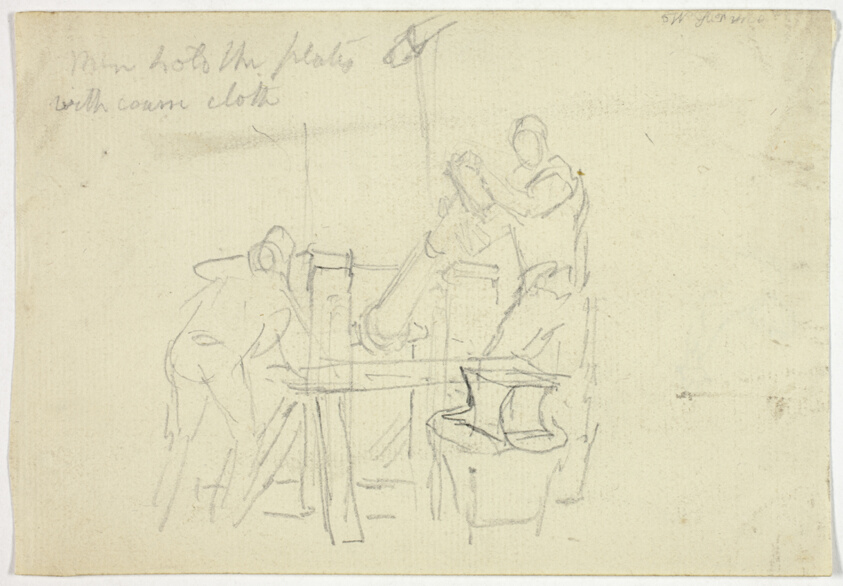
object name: Drawing and Watercolor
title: Two Men Working at a Machine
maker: William Henry Pyne (English, 1769-1843)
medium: Graphite on cream laid paper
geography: England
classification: graphite; drawings (visual works); prints and drawing